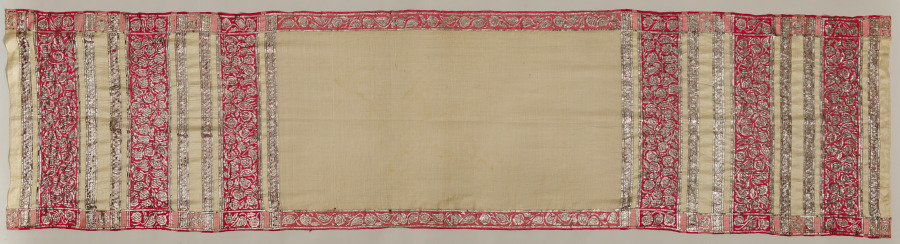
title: Scarf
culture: Africa, North Africa, Algeria, Algerian weaver and embroiderer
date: early 1900s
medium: Silk, metal strips, linen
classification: Embroidery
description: An Algerian weaver used alternating red and white silk wraps and wefts (vertical and horizontal threads) to create a checkerboard pattern of deep reds, solid white, and light pink sections on this textile. The central portion is woven of a different material, potentially linen. An embroiderer used large amounts of flat metal strips to create floral designs that shimmer brightly.